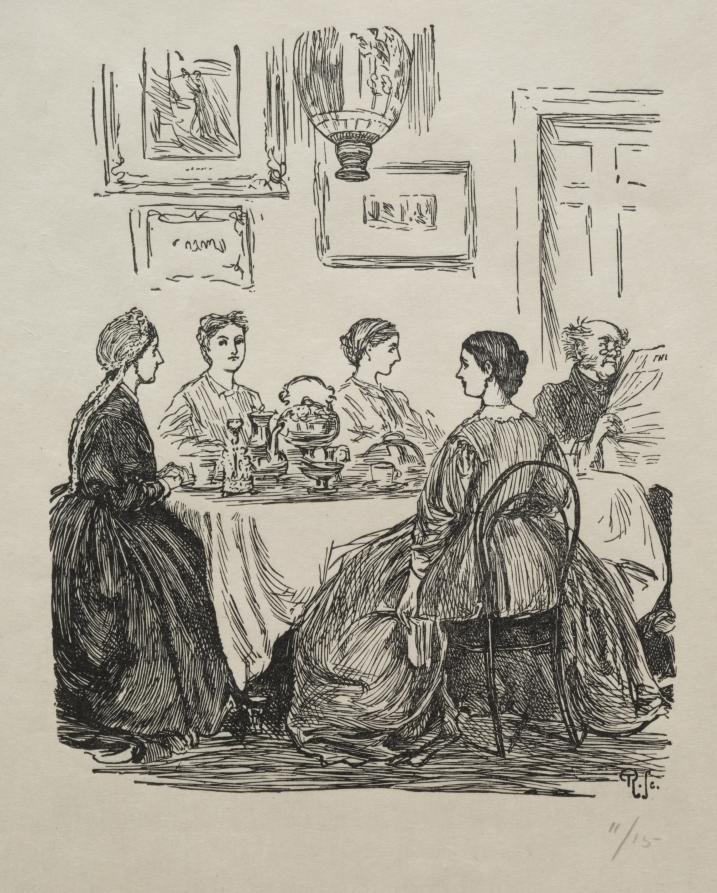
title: The Annual Question - Where Shall We Go?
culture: England, 19th century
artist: George Louis Palmella Busson Du Maurier (British, 1834–1896)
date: 1865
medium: wood engraving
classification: Print